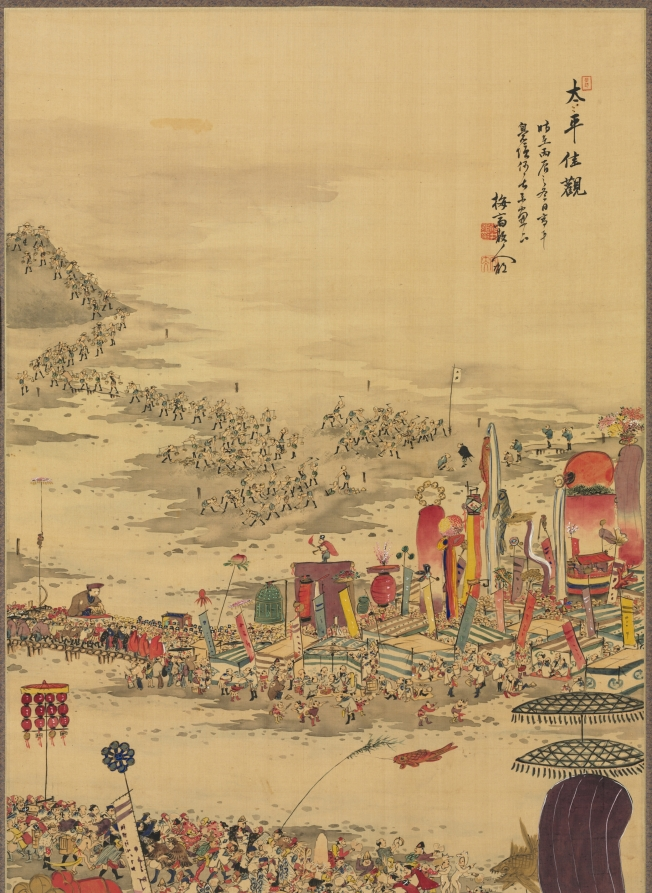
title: The Sand-Carrying Festival (Sunamochi Matsuri)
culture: Japan, Edo period (1615–1868)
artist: Sakai Basai (Japanese, dates unknown)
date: 1856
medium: hanging scroll; ink and color on silk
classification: Painting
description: Dredging waterways to preserve their function once required the cooperation of large numbers of people, seen at the top of this painting. Sand-carrying festivals were historically associated with religious rites or gathering alms to construct places of worship, and involved not only the labor of collecting sand from rivers but also parades and performances marking the event. Kyoto’s Kamo River has been dredged many times over the centuries, including in 1856, the year this image was made. Although the title at the upper right says Taihei Kakan, or “Peaceful, Beautiful View,” the painter’s delightful scene reminds his audience that at the best of times, peace may have little to do with quiet. Sakai Baisai was a student of literati painter Yamamoto Baiitsu (1783–1856). He was active until around 1879, when he relocated to Kobe to make his living as a design painter on porcelains destined for export.